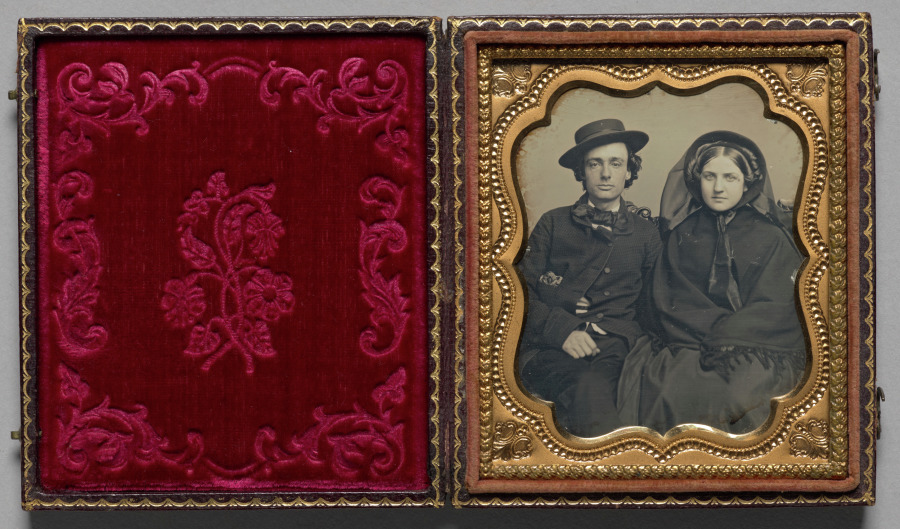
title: Seated couple in mourning attire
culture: America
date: c. 1856–58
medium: daguerreotype, sixth plate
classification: Photograph